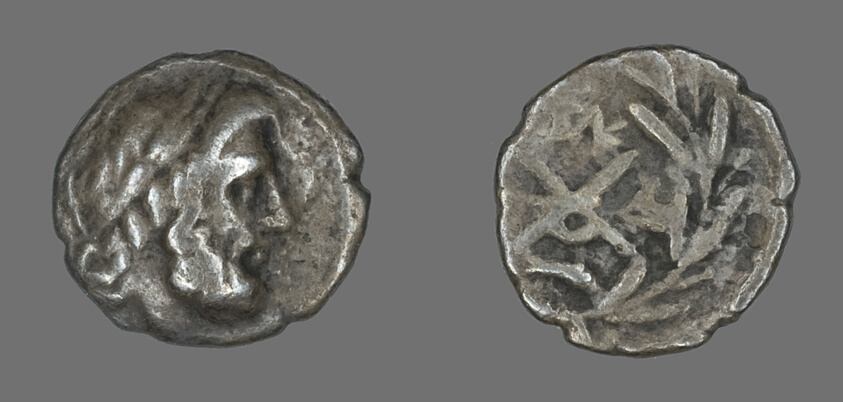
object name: Coin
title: Hemidrachm (Coin) Depicting the God Zeus Amarios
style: greek, ancient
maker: Greek, minted in Dyme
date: 280-146 BCE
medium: Silver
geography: Ancient Greece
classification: coin; ancient art